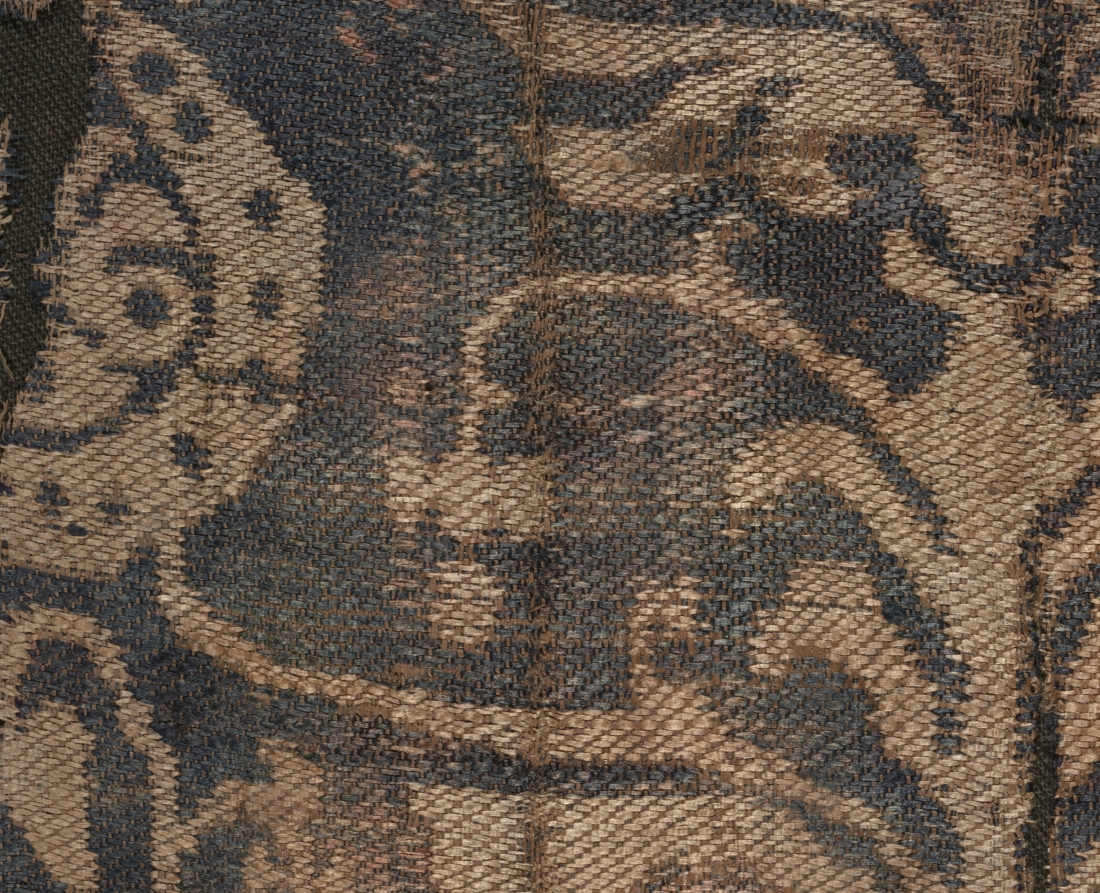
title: Roundel with curvilinear palmette tree, from a tunic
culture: Egypt or Syria(?)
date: 600–850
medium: Silk; complementary weft-faced twill weave with inner warps (samite)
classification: Textile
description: Originally, roundels like this were cut and sewn onto the front and back of a tunic, probably linen, in Egypt. They belong to a sizeable group of comparable silk decorations found in Akhmim, Egypt. In each roundel, a stylized palmette tree is enclosed within a simplified lotus border that evolved from an ancient Egyptian lotus motif.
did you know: This elaborate pattern was woven on a large, early loom known as a drawloom that automatically repeated designs across the width of the fabric.